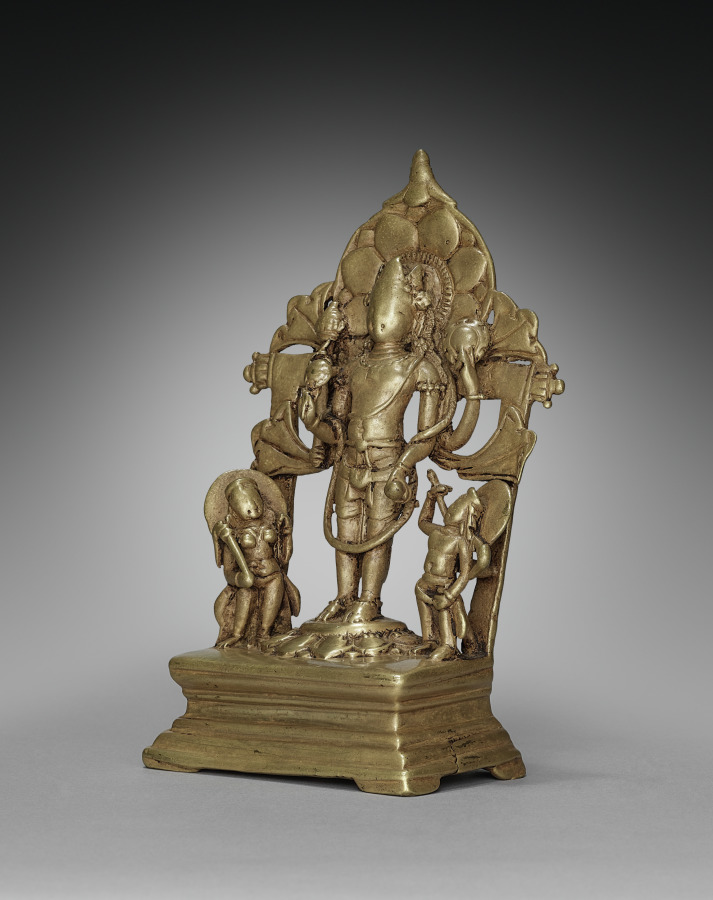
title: Standing Vishnu with Attendants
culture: India, Kashmir, 9th century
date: 800s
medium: brass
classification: Sculpture